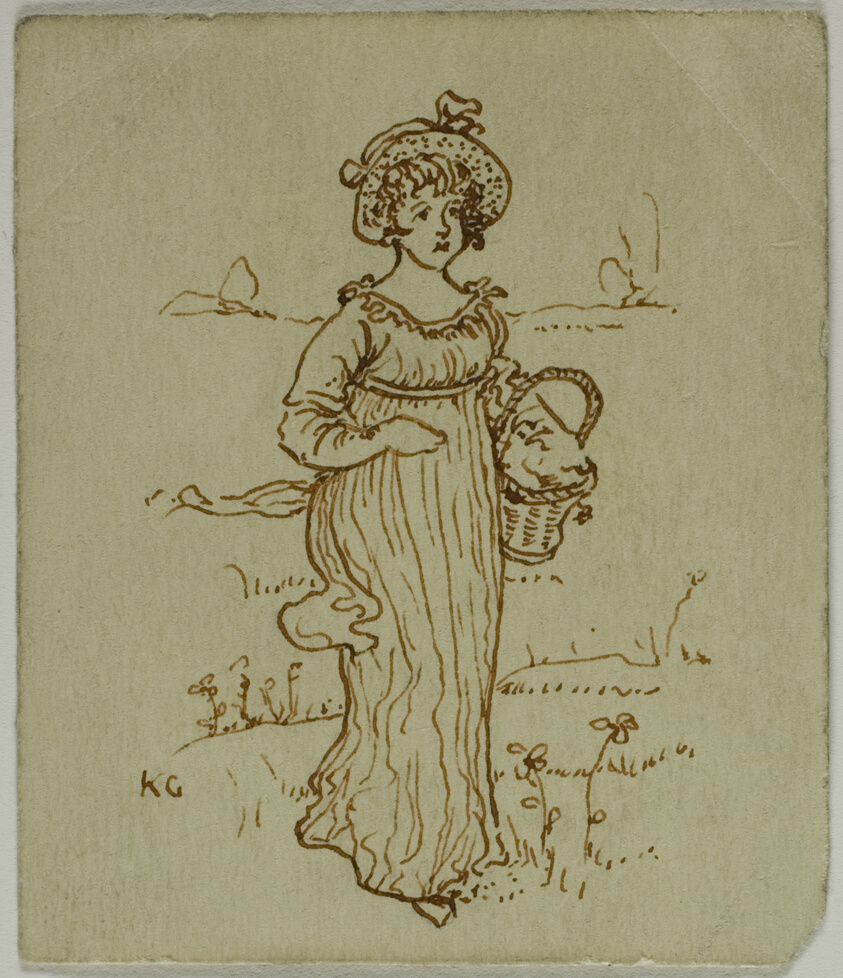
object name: Drawing and Watercolor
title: Girl with Basket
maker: Attributed to Kate Greenaway (English, 1846-1901); or an imitator of Kate Greenaway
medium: Pen and brown ink on cream wove paper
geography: England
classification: pen and ink drawings; drawings (visual works); prints and drawing